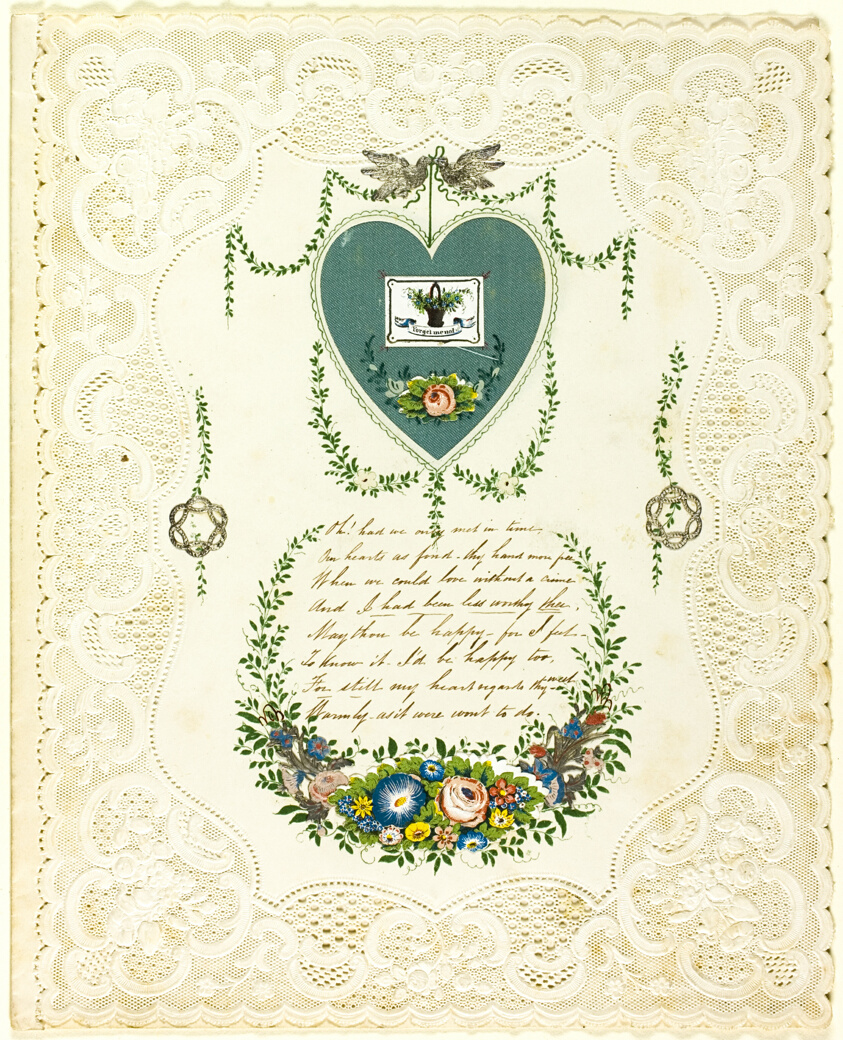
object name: Drawing and Watercolor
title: Oh, Had We Only Met in Time (valentine)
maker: George Meek (English, 19th century)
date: c. 1850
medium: Collaged elements over lithograph in green ink, with watercolor and pen and brown ink on cut and embossed ivory wove paper (lace)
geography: England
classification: valentine; prints and drawing; paper